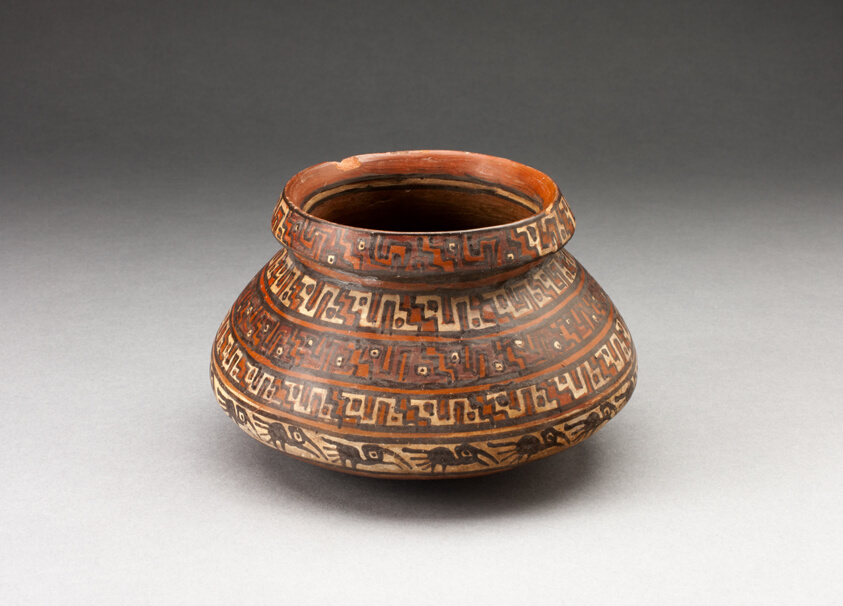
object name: Vessel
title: Miniature Jar with Bands of Geometric Motifs and Abstract Birds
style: ica, late intermediate period, Pre-Columbian, americas, Arts of the Americas, andean, andes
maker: Inca (South coast or southern highlands, Peru)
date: 1450–1532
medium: Ceramic and pigment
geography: Southern Peru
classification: earthenware; ceramics; vessel; art of the americas